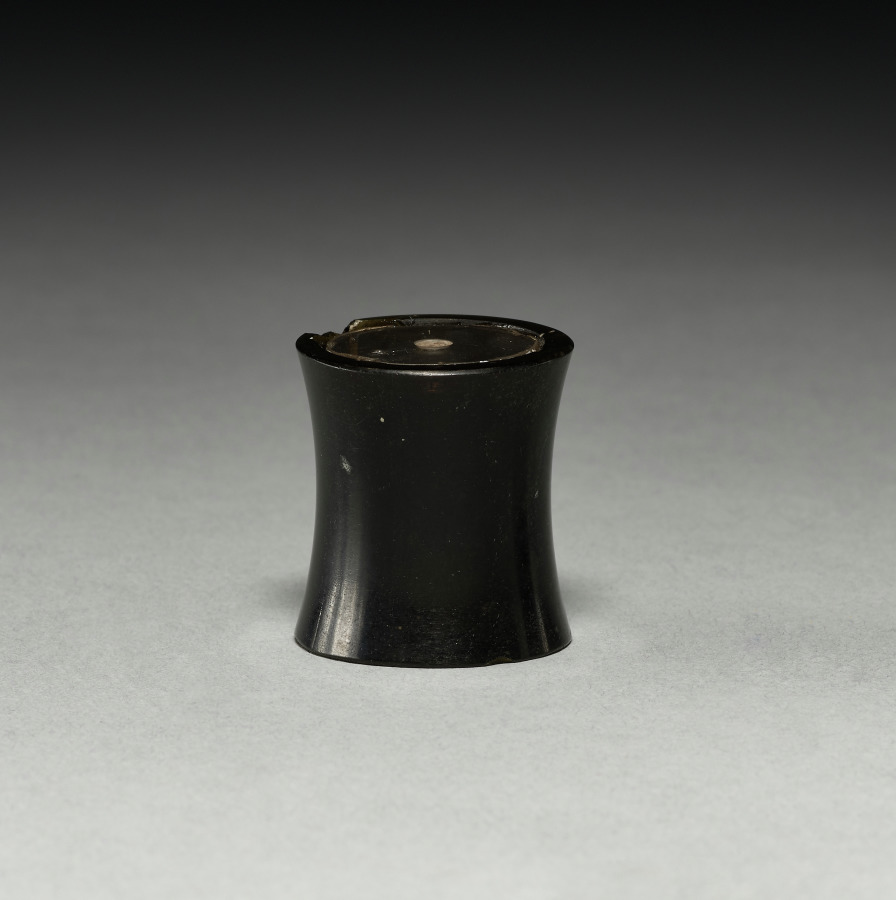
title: Ear Ornament (1 of 2)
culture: Mexico, Guerrero, Ichcatiopan, Mixtec or Aztec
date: c. 1200–1519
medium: obsidian, crystal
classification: Jewelry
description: This set of ear ornaments was reputedly found together with the gold and jade pectoral ornament shown nearby. They may have accompanied a noble burial, or perhaps constituted an offering deposit.